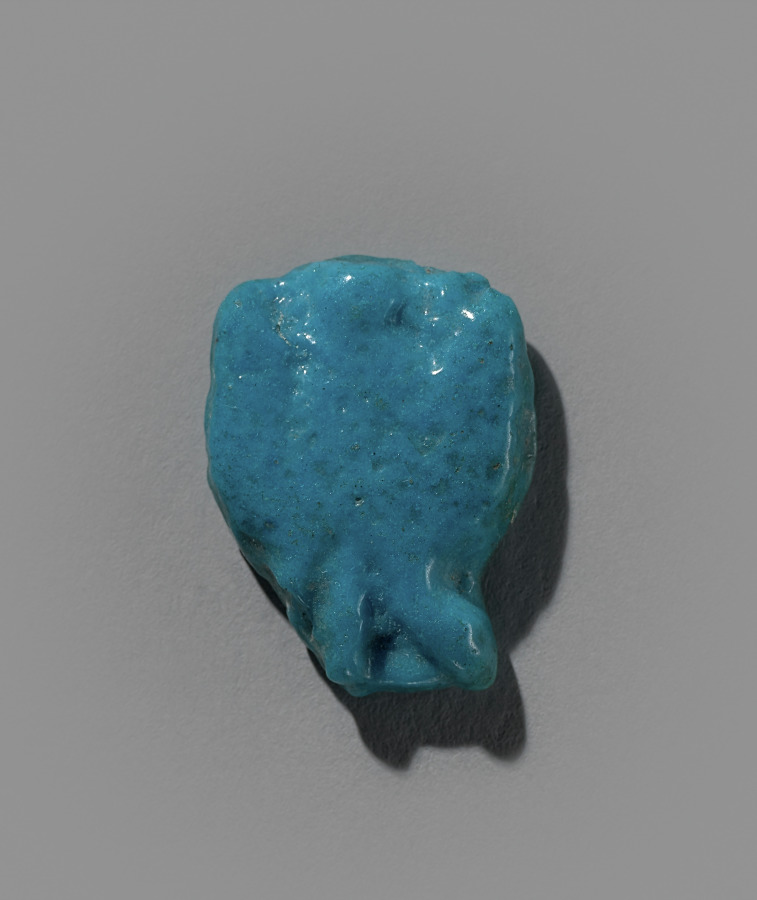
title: Food Model Amulet: Brace of Duck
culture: Egypt, New Kingdom (1540–1069 BCE), Dynasties 19–20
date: 1295–1069 BCE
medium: turquoise faience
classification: Amulets